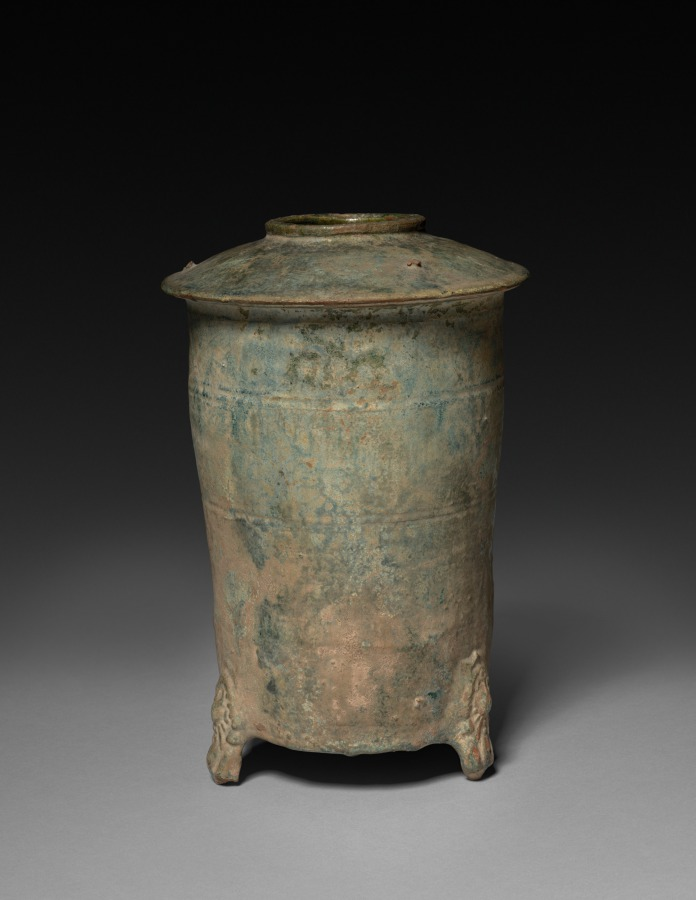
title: Granary Urn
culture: China, Han dynasty (202 BCE–220 CE)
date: 206 BCE–220 CE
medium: glazed earthenware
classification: Ceramic